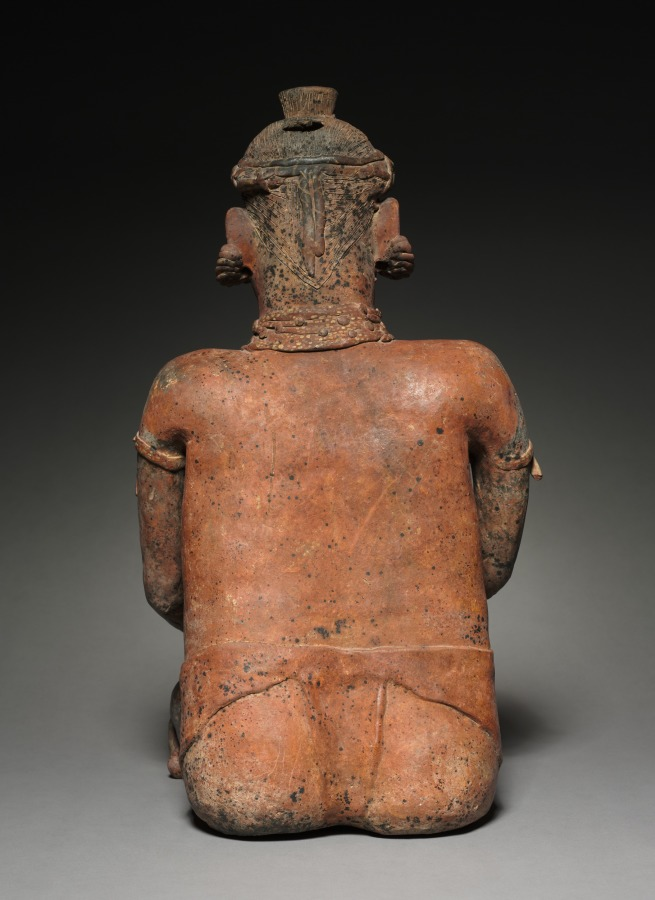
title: Male Seated Figure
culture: Mexico, Nayarit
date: 100 BCE–300 CE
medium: ceramic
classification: Ceramic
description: This couple-extremely fine examples of their kind-may commemorate the marriage of an important person, such as a chief, but could also represent siblings of a chiefly family. Whatever their relationship, their unity is conveyed by their physical similarities, including their jewelry, which marks high social station. The female is unusual in nursing an infant, likely a reference to generational renewal and the continuation of noble bloodlines. The significance of the male’s activity-beating a turtle-shell drum- is not understood.